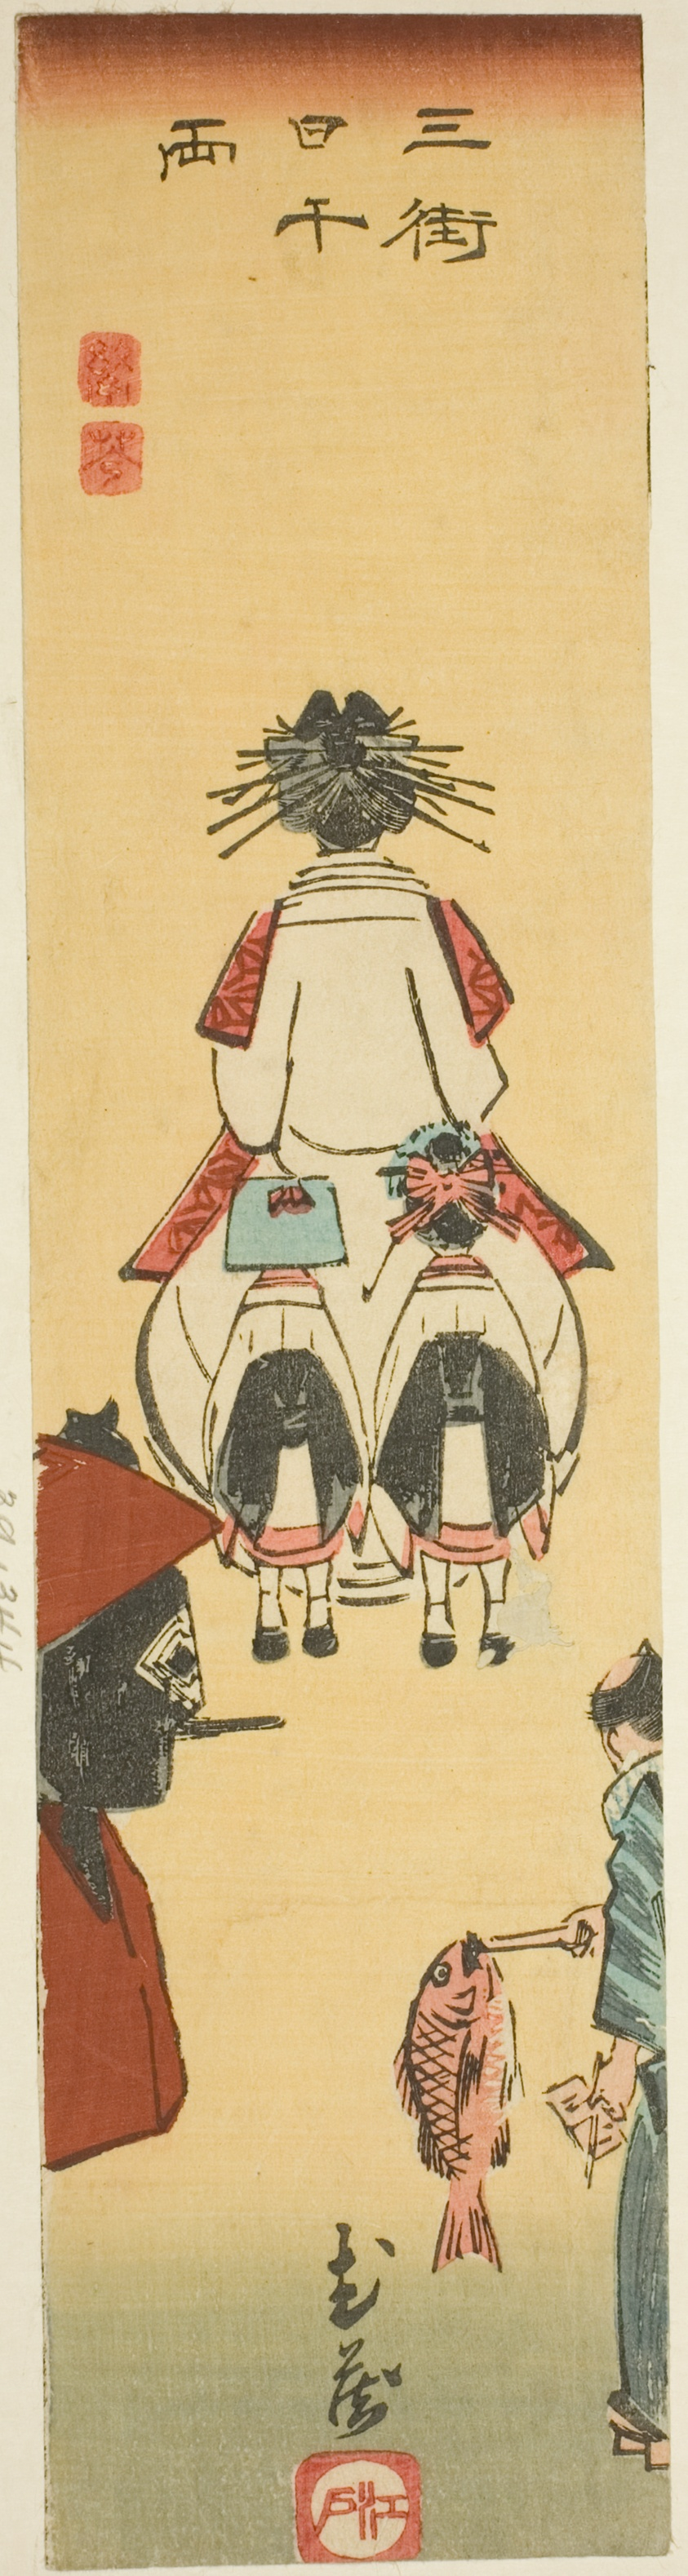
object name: Print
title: Musashi, section of sheet no. 6 from the series "Cutout Pictures of the Provinces (Kunizukushi harimaze zue)"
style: Japanese (culture or style)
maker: Utagawa Hiroshige 歌川 広重; Japanese, 1797-1858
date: 1852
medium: Color woodblock print; section of harimaze sheet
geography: Japan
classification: woodblock print; print; asian art